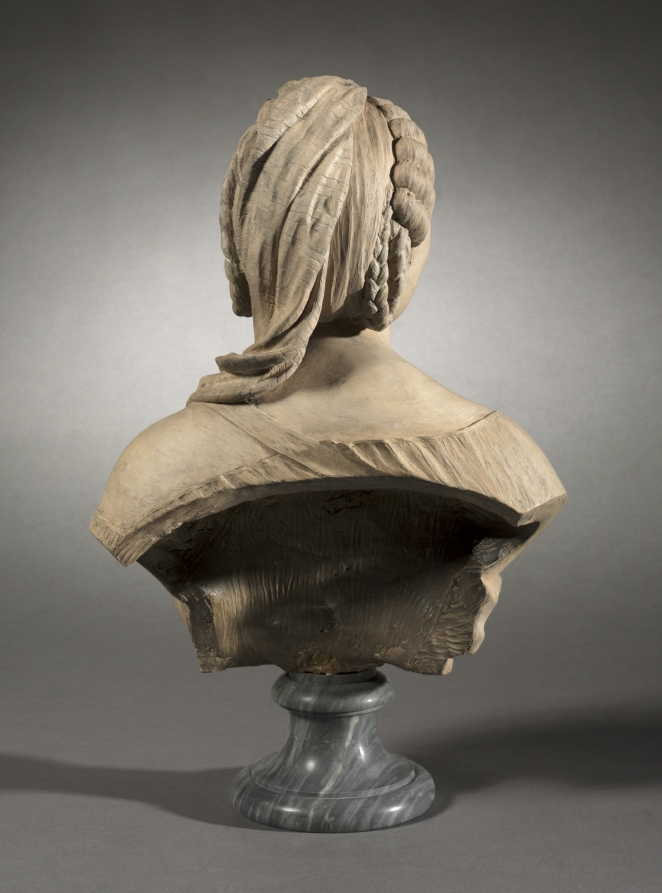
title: Portrait of a Woman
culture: France, 18th century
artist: Jean-Baptiste Defernex (French, c. 1729–1783)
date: 1759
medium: terracotta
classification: Sculpture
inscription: Signed on cut of left proper arm: "p[ar?] j. B, F, Defernex 1759"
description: The precise rendering of the costume and the unique facial features of the woman indicate this work is a true portrait, although the sitter has yet to be identified.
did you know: Art historians describe Defernex's portrait busts as "honest, unidealized, [and] quite free from gallant flattery."